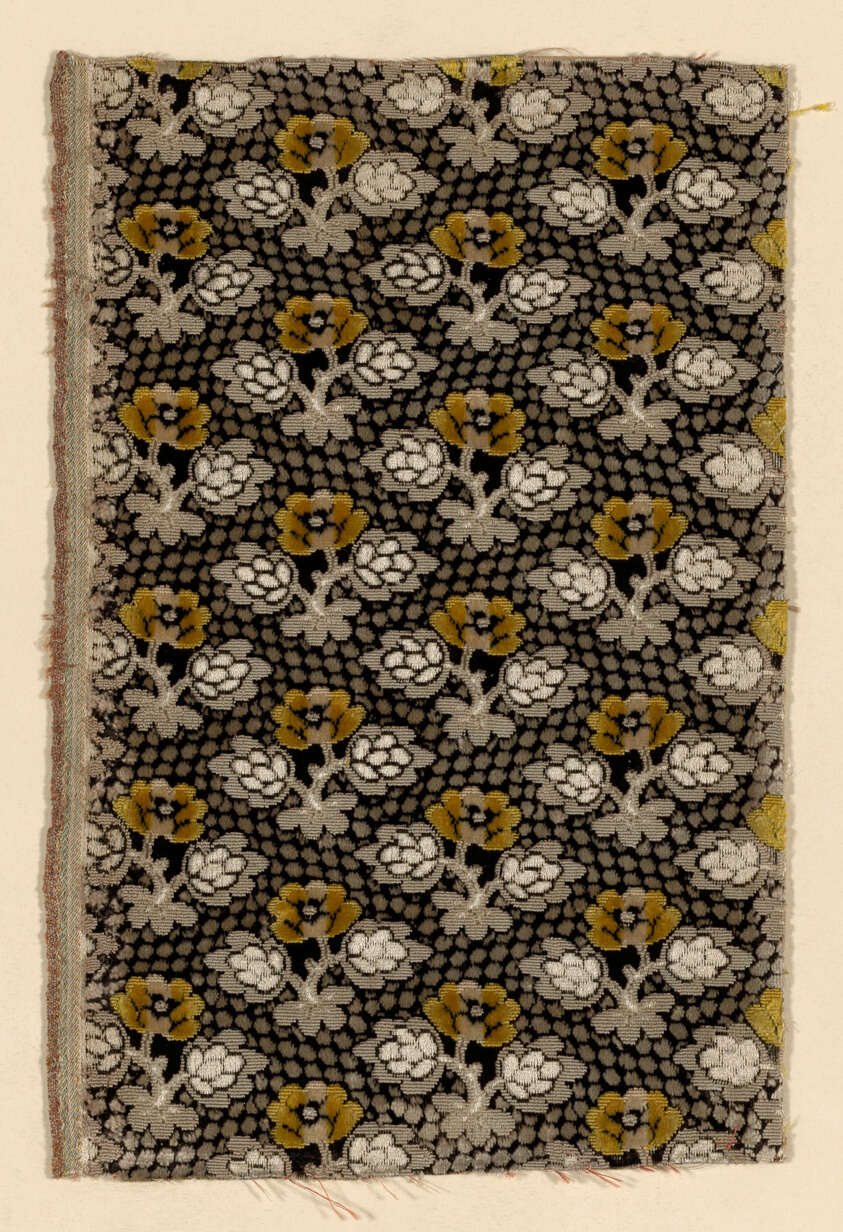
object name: Textile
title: Fragment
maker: France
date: 1750/75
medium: Silk, cut, uncut, and voided velvet against satin weave foundation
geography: France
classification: textile; weaving - velvet